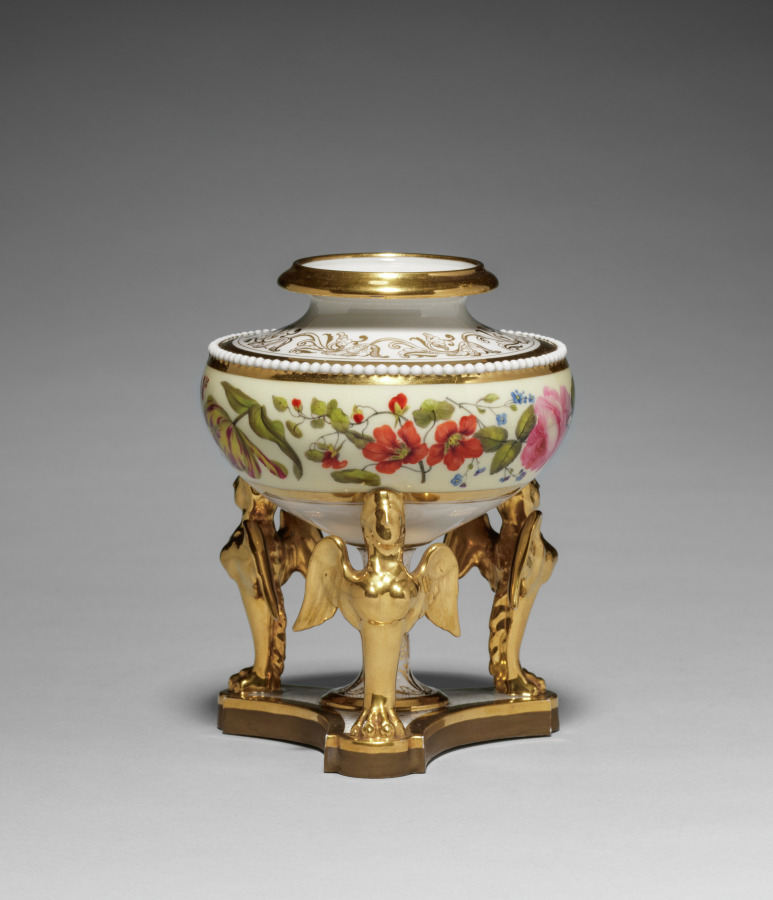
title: Urn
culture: England, Worcester, 19th century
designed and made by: Flight, Barr and Barr (British)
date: c. 1815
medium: artificial porcelain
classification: Ceramic